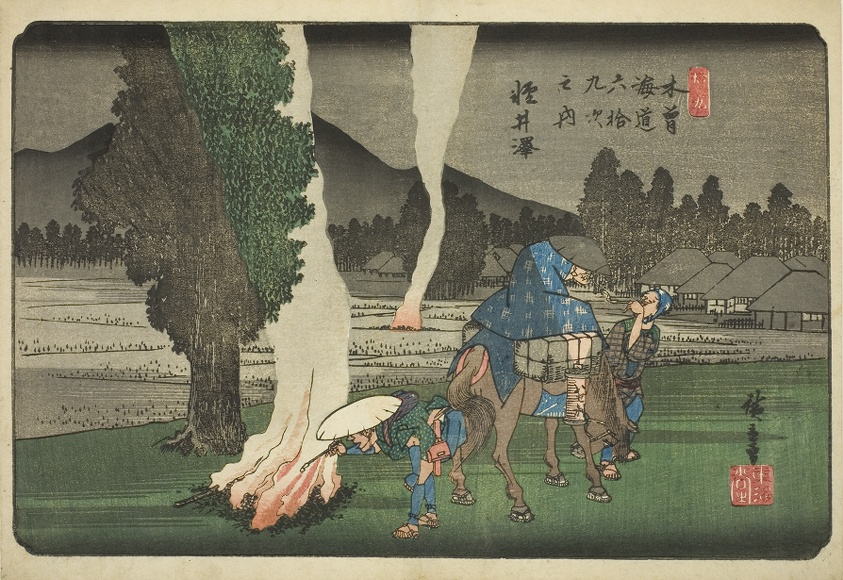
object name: Print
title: No. 19: Karuizawa, from the series "Sixty-nine Stations of the Kisokaido (Kisokaido rokujukyu tsugi no uchi)"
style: Japanese (culture or style)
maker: Utagawa Hiroshige 歌川 広重; Japanese, 1797-1858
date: c. 1835/38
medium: Color woodblock print; oban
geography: Japan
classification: woodblock print; print; asian art